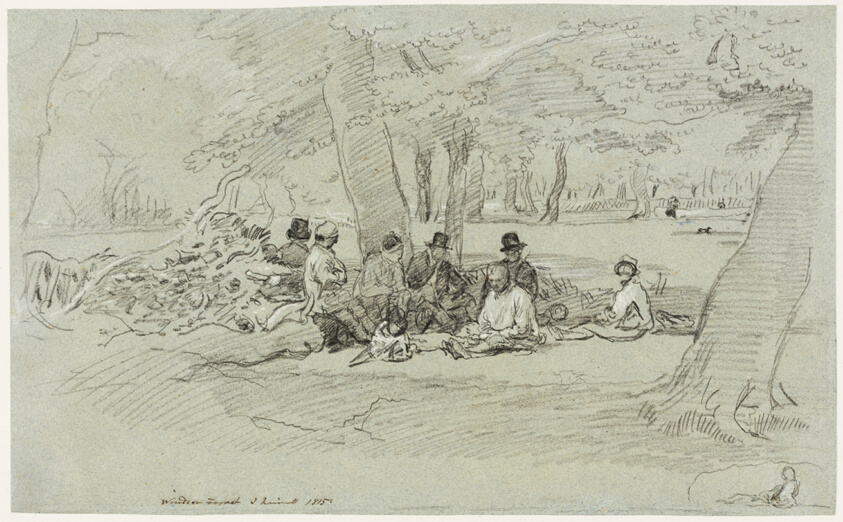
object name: Drawing and Watercolor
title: The Woodcutters' Repast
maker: John Linnell (English, 1792-1882)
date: 1815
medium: Black and white chalks on blue wove paper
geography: England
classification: chalk; drawings (visual works); prints and drawing